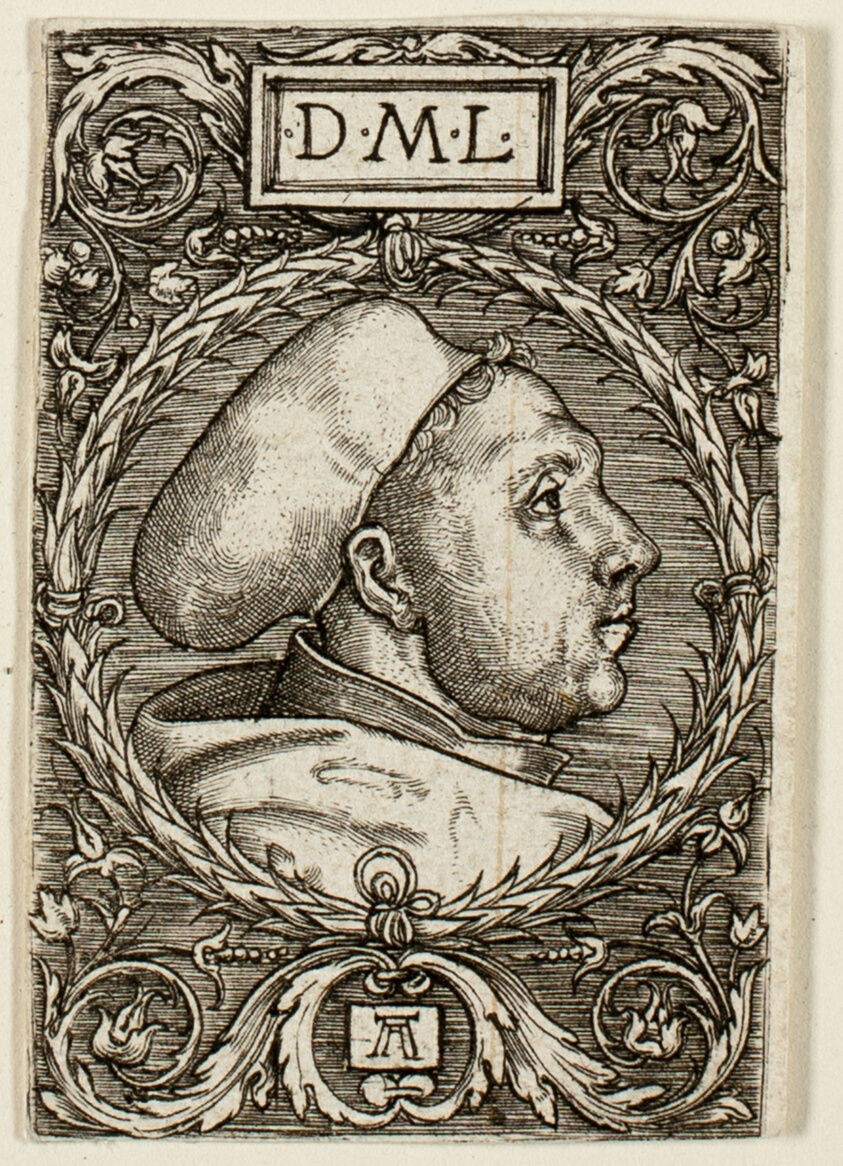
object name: Print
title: Martin Luther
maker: Albrecht Altdorfer (German, c. 1480-1538); after Lucas Cranach (German, c. 1472-1553)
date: c. 1525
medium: Engraving, with stippling, in black on cream laid paper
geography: Germany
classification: engraving; print; prints and drawing